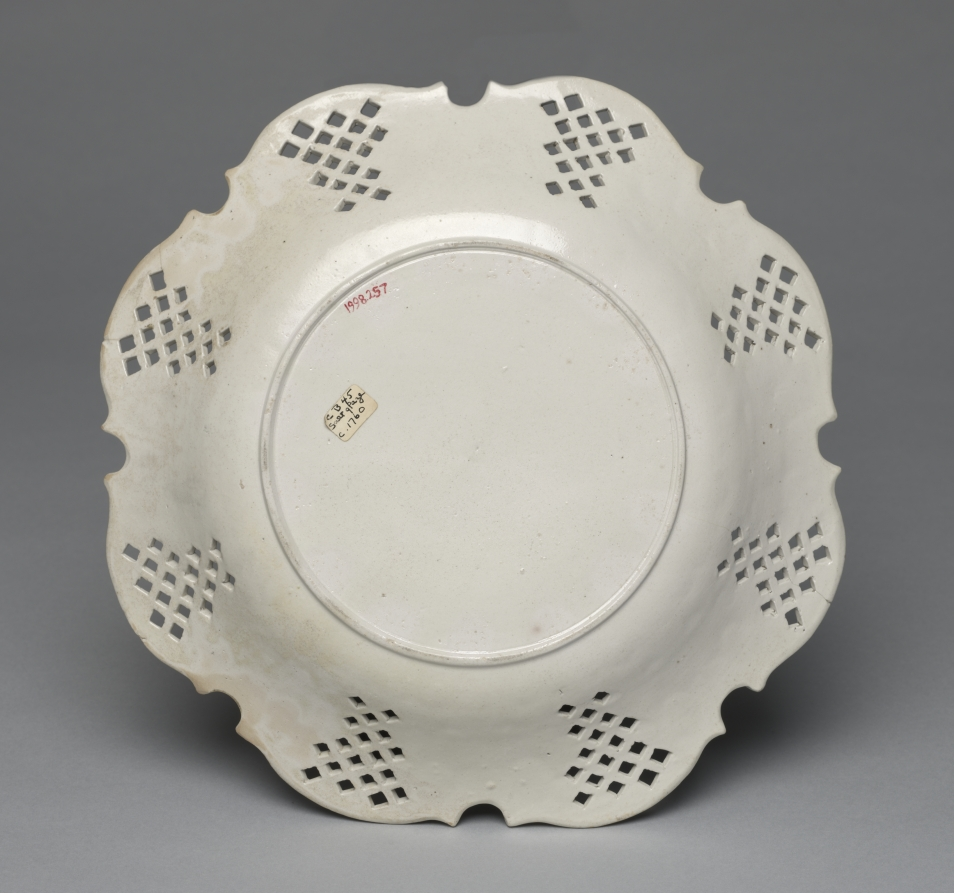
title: Plate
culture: England, Staffordshire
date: c. 1760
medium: salt-glazed stoneware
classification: Ceramic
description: This plate’s glossy texture was created by throwing salt into a kiln during the hottest point of the firing process. During the 1700s, salt-glazed dishes proved to be a popular substitute for porcelain because of their versatility, durability, and affordability. This particular plate features intricate basket weave patterns, decorative frames, and scalloped edges which were made by hand-pressing clay into a mold.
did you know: The three-dimensional designs on this plate are similar to both silver and straw baskets produced during the mid-1700s.